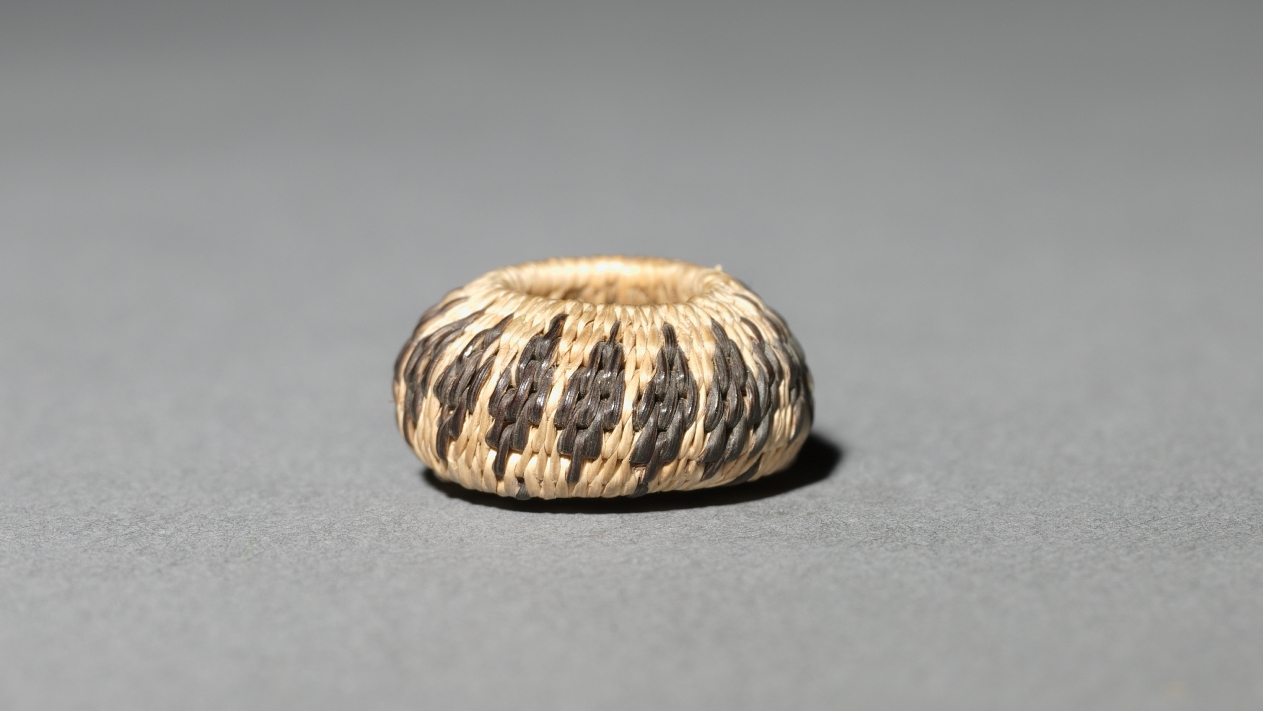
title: Miniature Round Basket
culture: California, Pomo, late 19th-early 20th century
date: late 1800s-early 1900s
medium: plant materials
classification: Basketry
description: Miniature baskets were made to demonstrate the basket-maker’s virtuoso skill, and these tiny marvels seem to be no exception—the smallest are just a few millimeters wide but still patterned. For such fine work, dexterity was required as much for preparation of materials as for weaving.